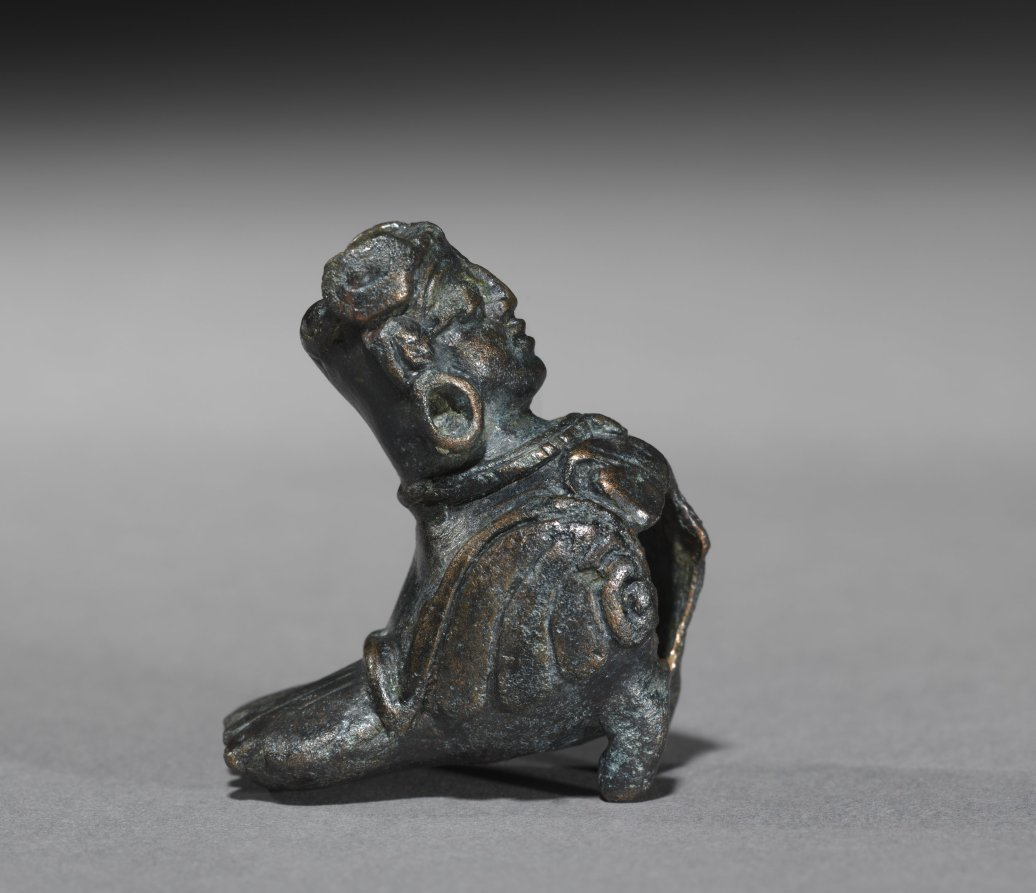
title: Harpy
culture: Iran, Seljuk Period, 11th-12th Century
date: 1000s-1100s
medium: bronze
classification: Jewelry